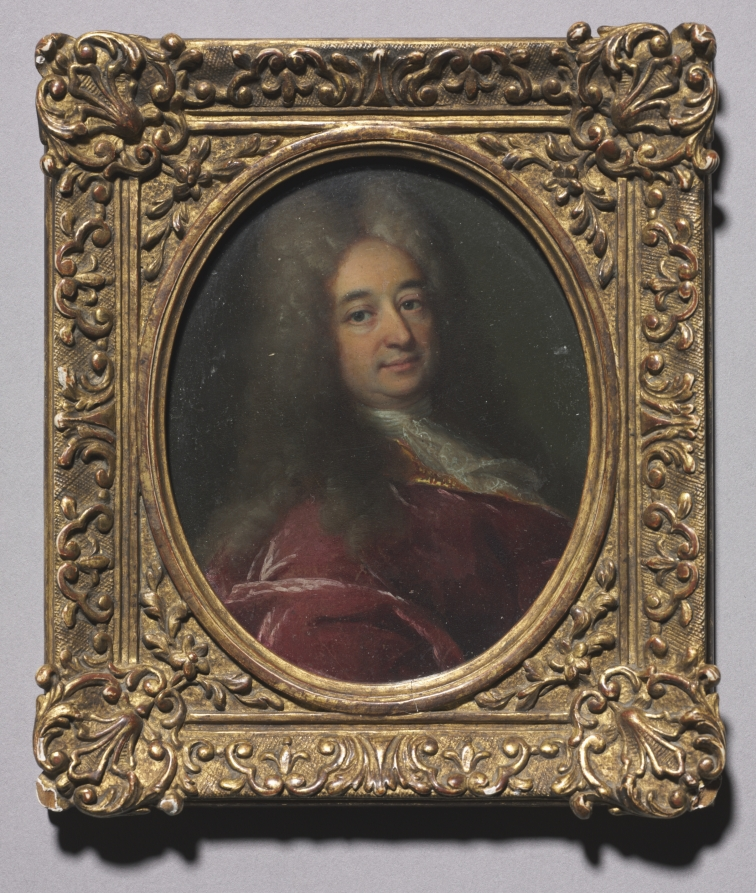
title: Portrait of Robert Levrac-Tournières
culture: France, 18th century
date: 1705–1710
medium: oil on copper in a gold and diamond frame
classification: Portrait Miniature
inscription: annotated on back: 869 Robert Lerrac- Tournieres 1668-1752